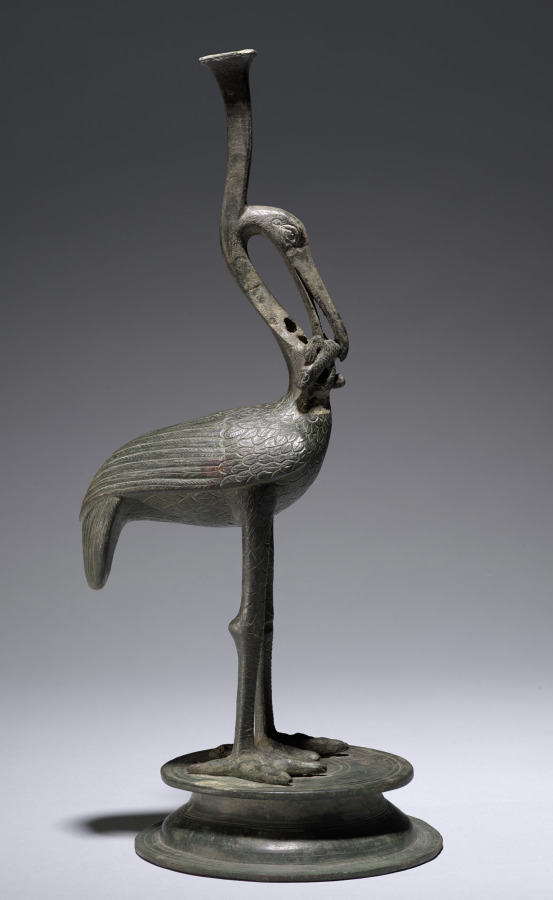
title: Ibis Eating a Lizard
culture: Italy, Rome, Roman Empire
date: 100 BCE–100 CE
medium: bronze, hollow cast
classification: Sculpture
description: The ibis is an Egyptian bird, shown here standing firmly on both legs with a lizard in its beak. The bird rests on a two-tiered circular base, and a vertical stem with incised decoration extends above the ibis’s head. While an Egyptian animal, the image of the ibis devouring a lizard became common only in the Roman world, depicted in wall paintings and seen on Barbotine ware, a type of pottery. This sculpture may be unique, however, in showing this motif in the round.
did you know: This sculpture was possibly used as a support for furniture, a candelabrum, or an incense burner.